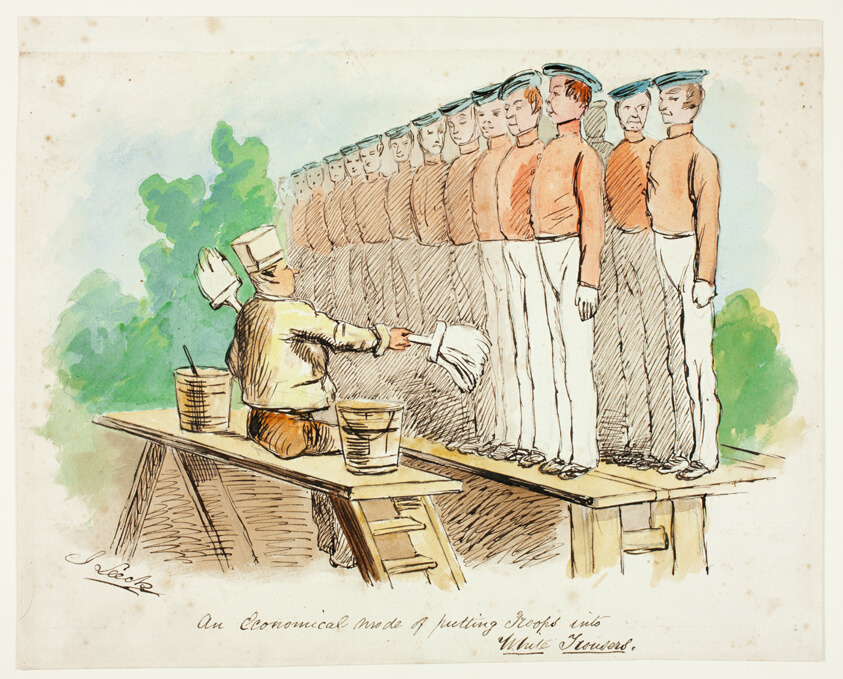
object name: Drawing and Watercolor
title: An Economical Mode of Putting Troops into White Trousers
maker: John Leech (or possibly after); English, 1817-1864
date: 1840/50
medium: Watercolor and pen and brown ink, over graphite, on cream wove paper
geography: England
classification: watercolor; drawings (visual works); prints and drawing